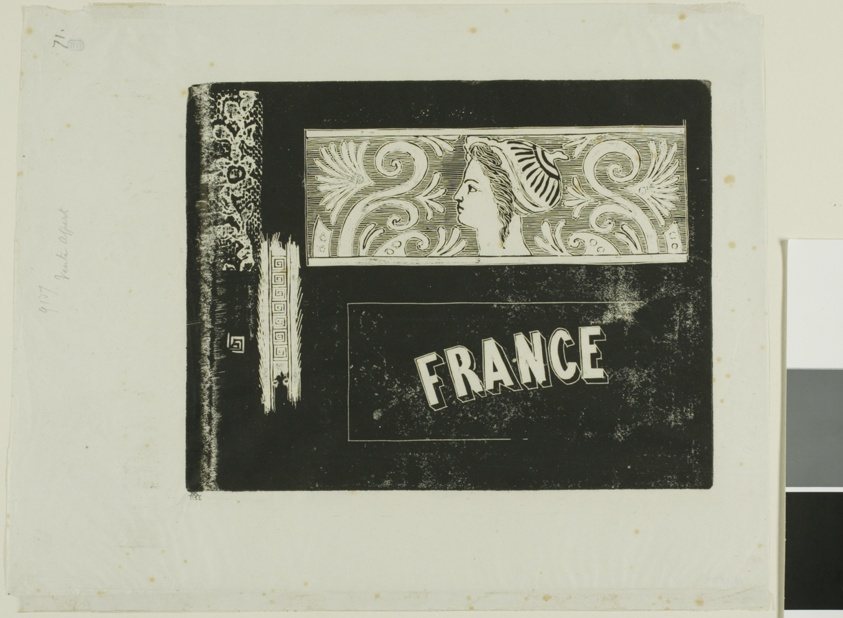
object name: Print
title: Study for Share Certificates in a Fraudulent Franco-Californian Company, No. 2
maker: Charles Meryon (French, 1821-1868)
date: 1855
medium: Gillotage in black on ivory wove paper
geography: France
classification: relief etching; print; prints and drawing